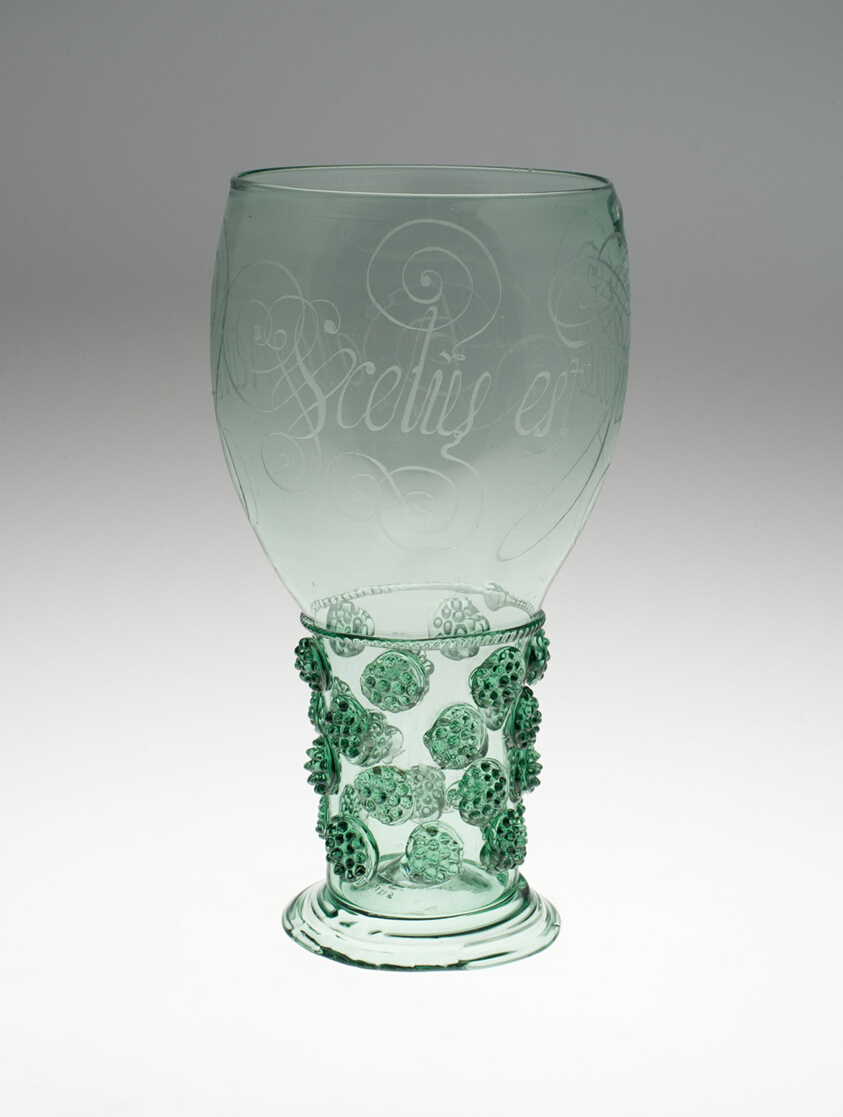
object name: Glass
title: Prunted Beaker (Roemer)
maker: Netherlands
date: c. 1640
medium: Glass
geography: Netherlands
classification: drinking vessel; glass; european decorative arts